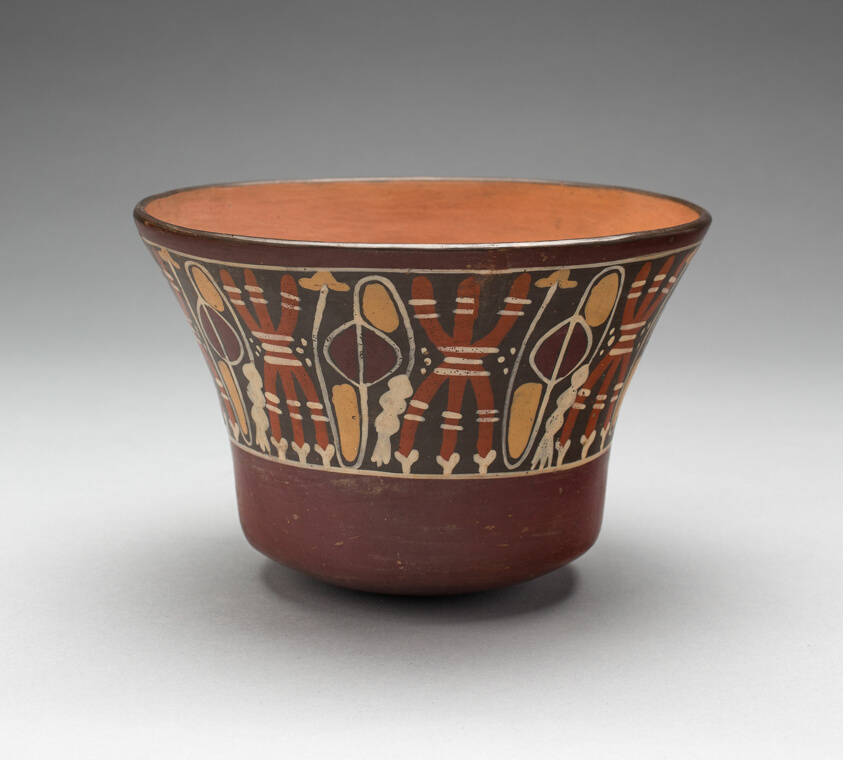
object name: Vessel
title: Bowl Depicting Bound Lances and Slings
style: nazca, early intermediate period, Pre-Columbian, americas, Arts of the Americas, andean, andes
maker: Nazca; North coast, Peru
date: 180 BCE–500 CE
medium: Ceramic and pigment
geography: Peru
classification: bowl; earthenware; art of the americas; ceramics; vessel